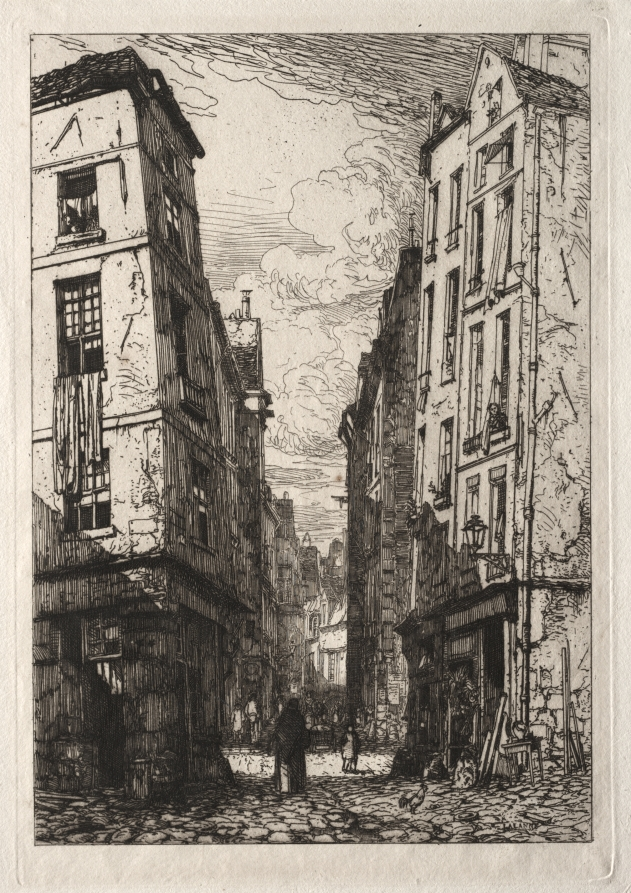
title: Rue des Marmousets (Old Paris)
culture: France, 19th century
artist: Maxime Lalanne (French, 1827–1886)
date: 1862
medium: etching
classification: Print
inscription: On plate, lower left center: "Lalanne"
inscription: in graphite, lower left corner: "Lalanne (signed) Rue des Marmousets"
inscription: in graphite, lower right corner: "8"